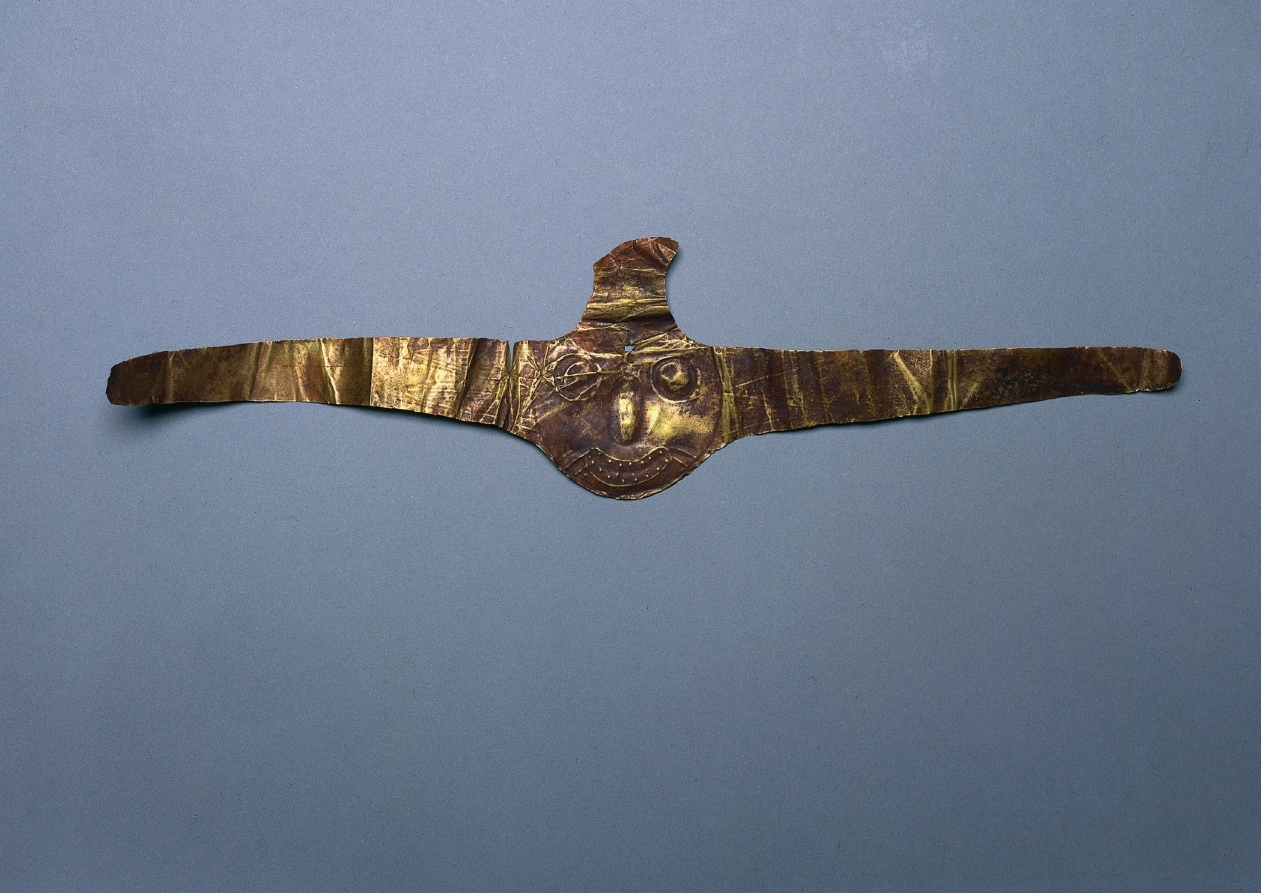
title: Headdress Ornament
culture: Peru, South Coast, Paracas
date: c. 300 BCE–200 CE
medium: hammered and embossed gold-copper alloy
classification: Jewelry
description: Gold ornaments have been discovered among the innermost wrappings of Paracas mummy-bundles, and were probably personal possessions of the deceased. The embossed image in the center of each ornament is a deity face, characterized by protruding eyes and a grinning, toothy mouth. Snakelike appendages emanate from the face. Figures embroidered on Paracas garments are frequently depicted with similarly shaped ornaments, either worn above the forehead or brandished in one hand.